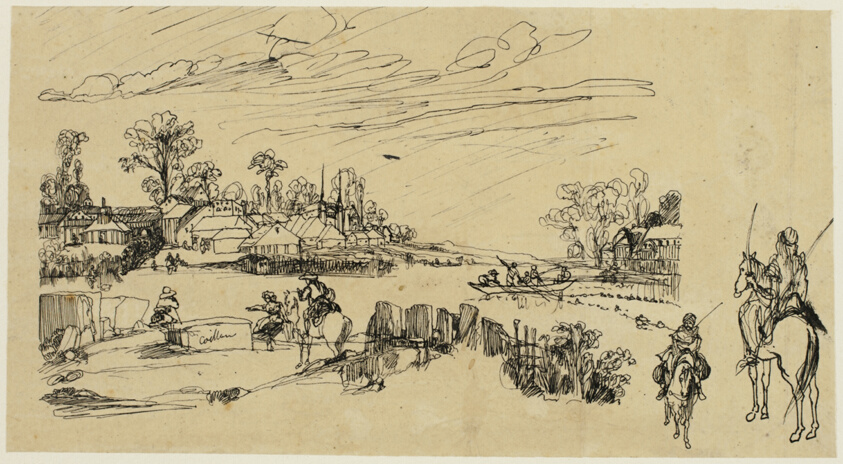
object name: Drawing and Watercolor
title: Horsemen and Fishermen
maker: Rodolphe Bresdin (French, 1825-1885)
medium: Pen and black ink, on tan tracing paper, laid down on ivory wove paper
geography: France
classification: pen and ink drawings; drawings (visual works); prints and drawing